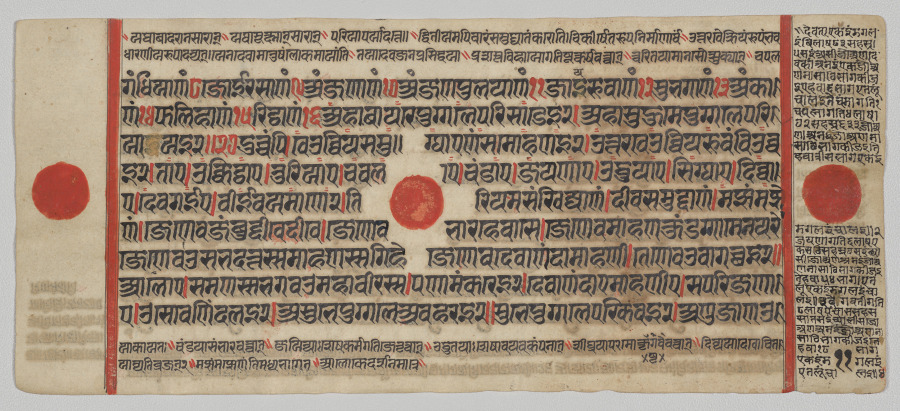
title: Text, Folio 11 (verso), from a Kalpa-sutra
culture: Western India, Gujarat, last quarter of the 15th century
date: c. 1475–1500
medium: Gum tempera, ink, and gold on paper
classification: Painting